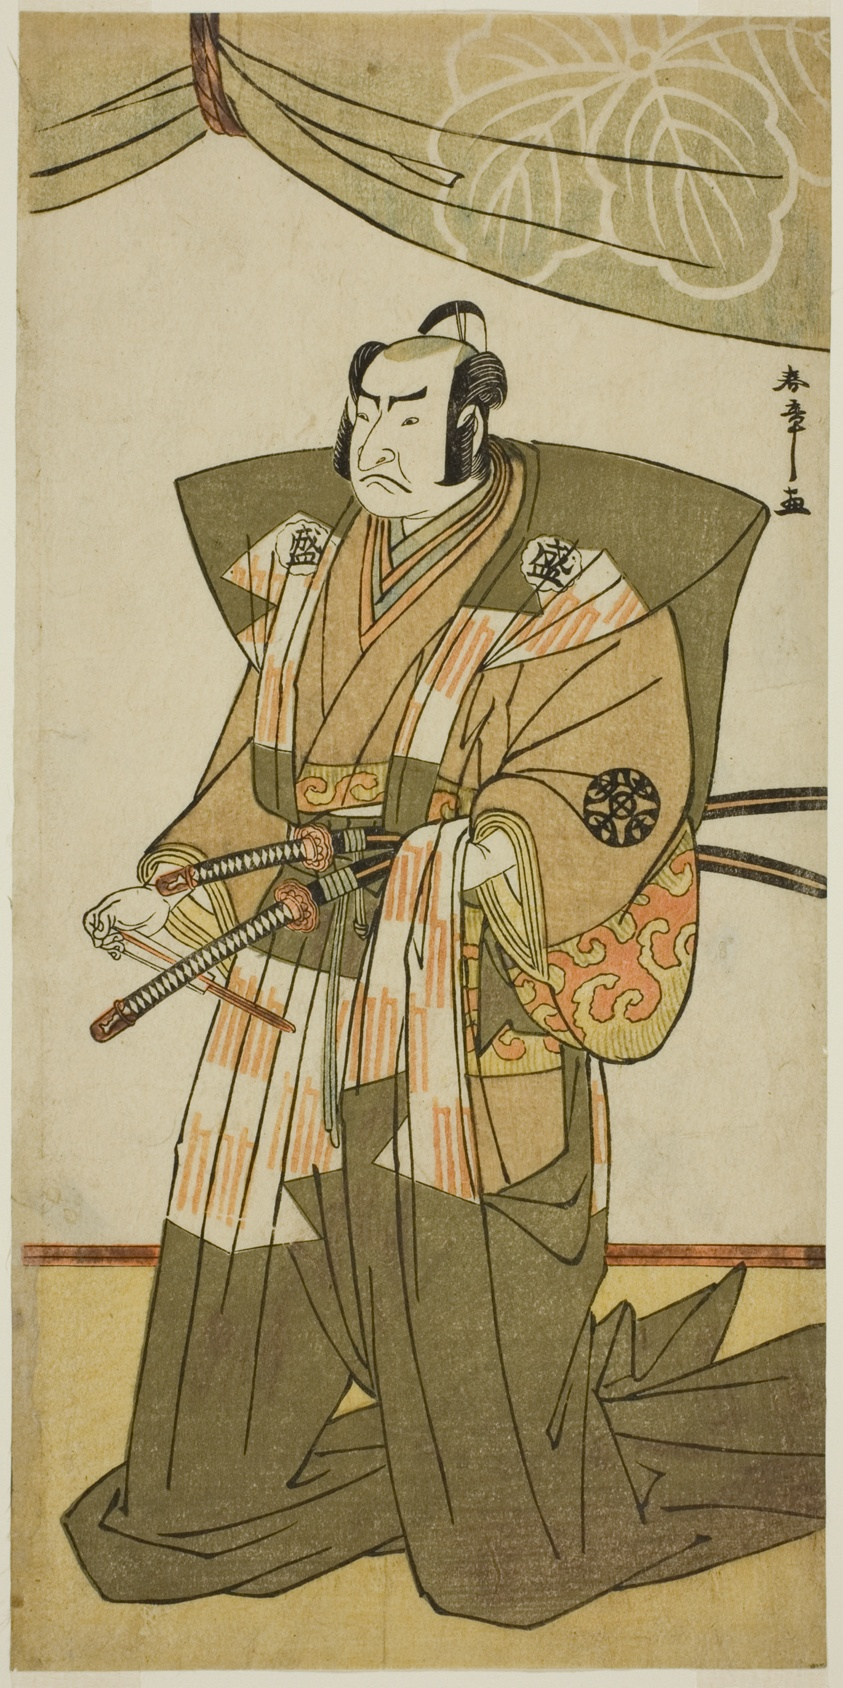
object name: Print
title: The Actor Nakamura Nakazo I as Saito Sanemori in the Play Kitekaeru Nishiki no Wakayaka, Performed at the Nakamura Theater in the Eleventh Month, 1780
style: Japanese (culture or style)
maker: Katsukawa Shunsho 勝川 春章; Japanese, 1726-1792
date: c. 1780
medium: Color woodblock print; hosoban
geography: Japan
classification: woodblock print; print; asian art